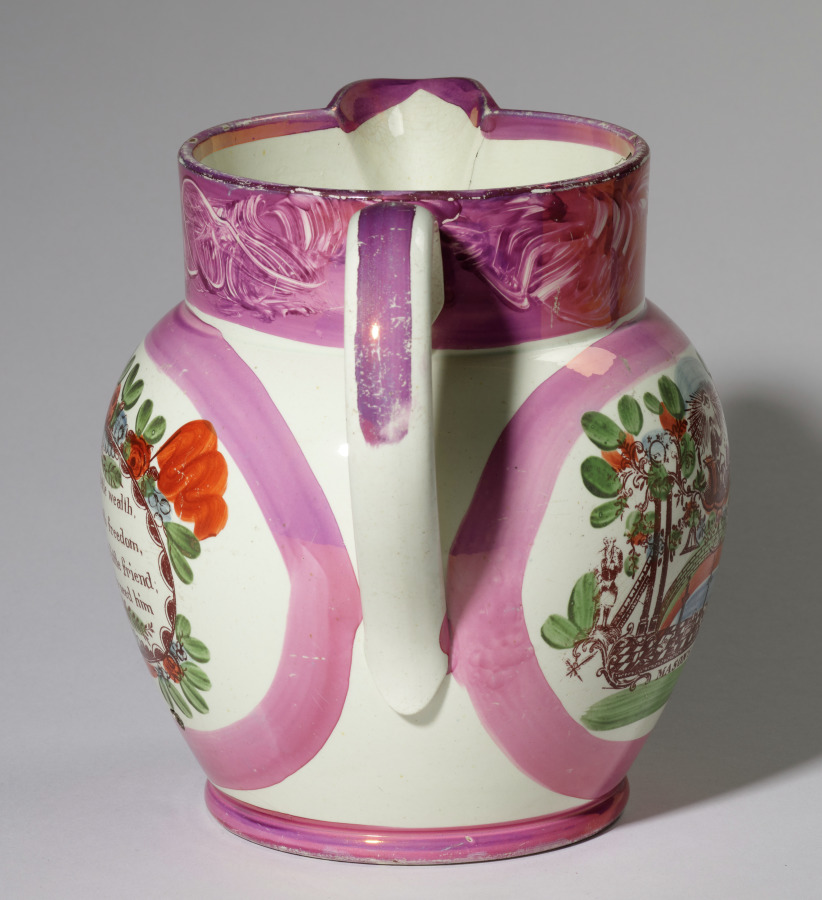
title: Masonic Pitcher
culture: England, Staffordshire, late 18th-early 19th Century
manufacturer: Staffordshire Factory (British)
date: c. 1800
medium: pottery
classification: Ceramic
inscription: on front: "MASON'S ARMS"; on one side: "A little health a little wealth, a little house with freedom, And at the end a little friend With little cause to need him"; on other side: "Here's to you My Jovial brother, When this is out We'll have another."